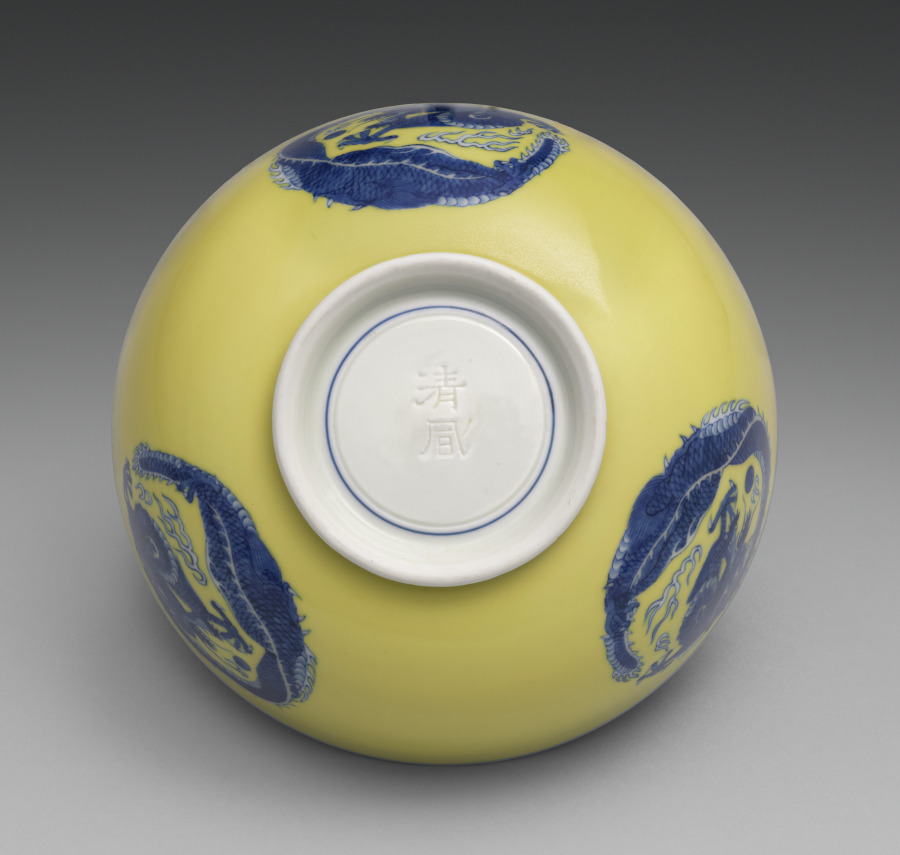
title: Bowl with Dragon Roundels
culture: Japan, Meiji period (1868–1912)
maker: Seifū Yohei III (Japanese, 1851–1914)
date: 1897–1914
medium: Porcelain with underglaze blue, iron oxide, and yellow glaze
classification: Ceramic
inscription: 清風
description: While this bowl has no box, it is attributed to Yohei III based in part on the style of the signature on its base. Below the rim, the bowl’s interior has a ring of clouds in underglaze blue. On the outside, bright yellow is combined with roundels of dragons capturing flaming jewels, painted under the glaze in blue, while the inside has a single dragon roundel in underglaze blue against a white ground. The work’s bold decorative scheme is more in keeping with what might be expected from the high-output studio of Miyagawa Kozan in Yokohama, whose products were designed for mass appeal. A similar bowl is in the collection of the Museum of Ceramic Art, Hyogo.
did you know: Seifū Yohei III was inspired by the Chinese mythical animals and motifs with magical symbolism—including clouds and fungi—that were common on porcelain objects made at Jingdezhen in China during the Ming dynasty (1368–1644) and then exported around the world.